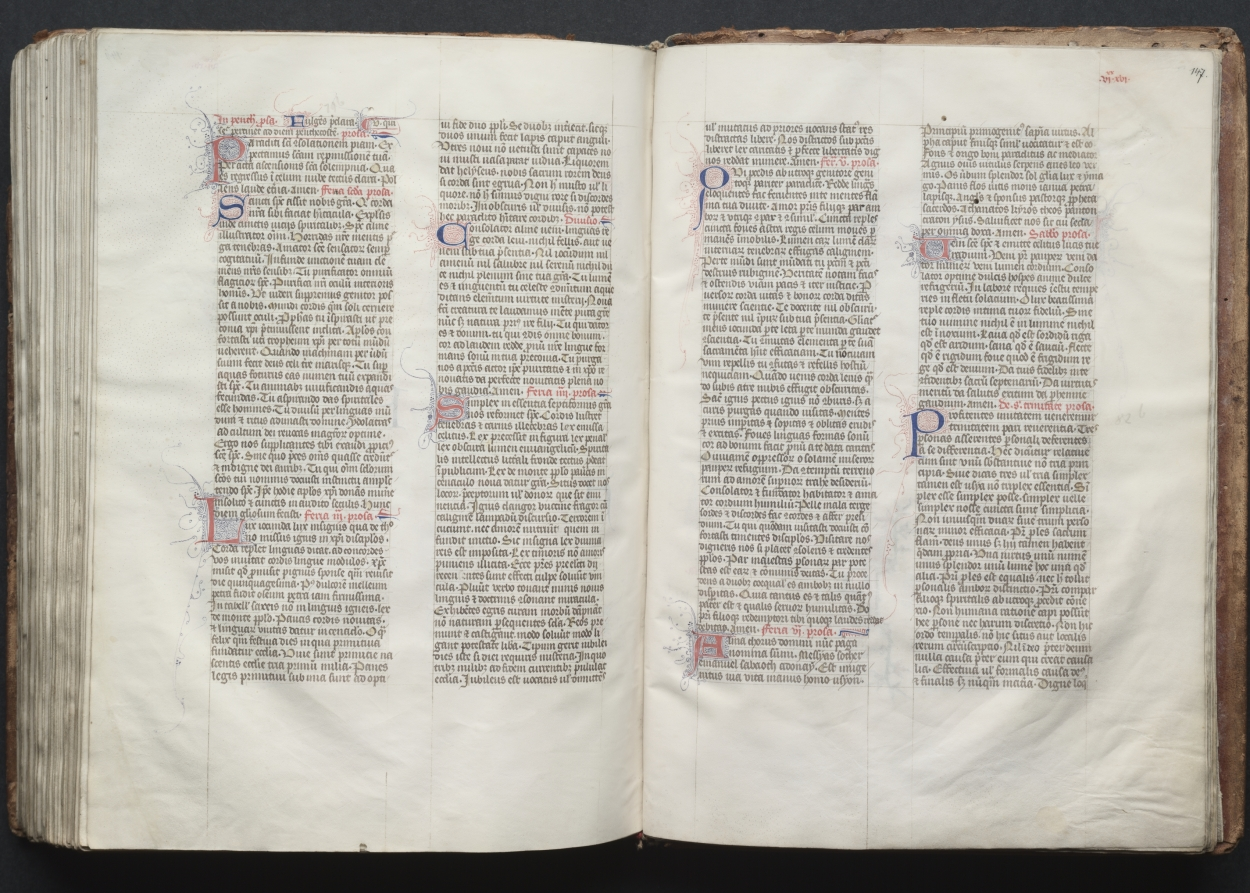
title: The Gotha Missal: Fol. 146v, Text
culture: France, Paris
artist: Master of the Boqueteaux (French)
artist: and Workshop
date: c. 1375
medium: ink, tempera, and gold on vellum; blind-tooled leather binding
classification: Bound Volume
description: The style and quality of this manuscript's decoration is typical of deluxe Parisian books made for aristocratic or royal patrons. Most of the book's decoration appears to be the work of the Master of the Boqueteaux, an artist active at the court of King Charles V (died 1380). His style was apparently shared by a number of book illuminators working in and around Paris. It is very possible that the Gotha Missal belonged to Charles V, but is not provable because the manuscript has no royal portraits and lacks a colophon. Given the book's magnificent decoration, however, it would seem that it was produced for a Valois prince, if not for the king himself. The manuscript receives its name from the German dukes of Gotha, its later owners.